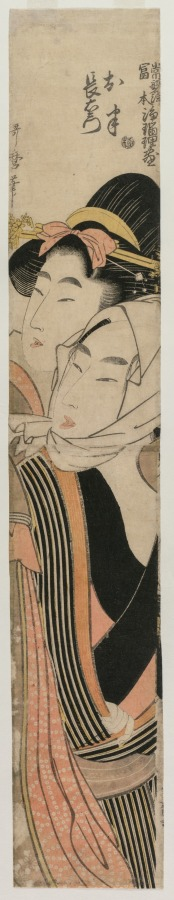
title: The Lovers Ohan and Choemon (from the series Joruri Ballads in the Tokiwazu and Tomimoto Styles)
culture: Japan, Edo period (1615–1868)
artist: Kitagawa Utamaro (Japanese, c. 1754–1806)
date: early or mid 1800s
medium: color woodblock print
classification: Print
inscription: Signature: Utamaro hitsu Censorship Seal: kiwame